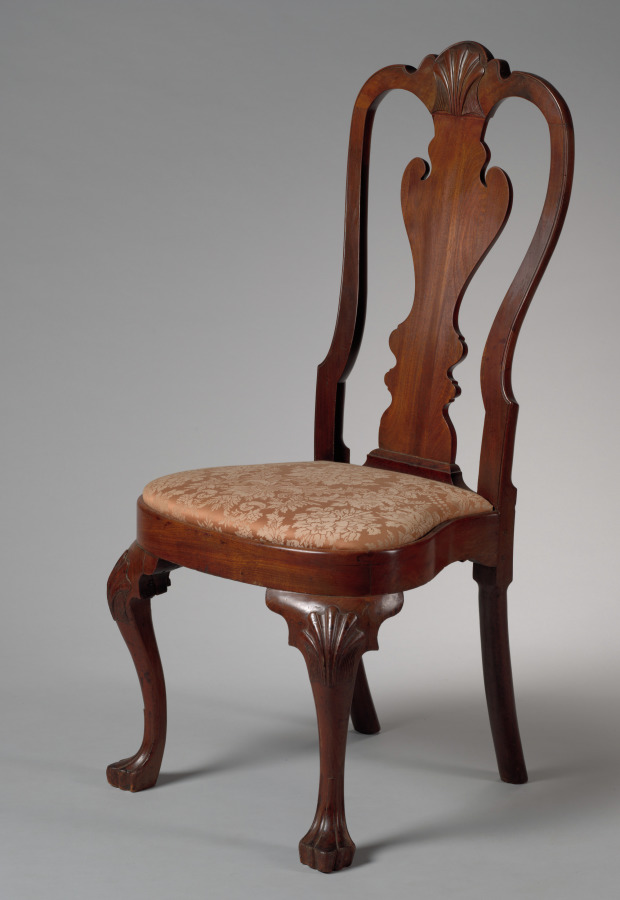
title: Side Chair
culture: America, Pennsylvania, Philadelphia, Queen Anne style, 18th century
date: 1735–1745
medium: walnut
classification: Furniture and woodwork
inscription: inscribed rear seat rail: "VIII."